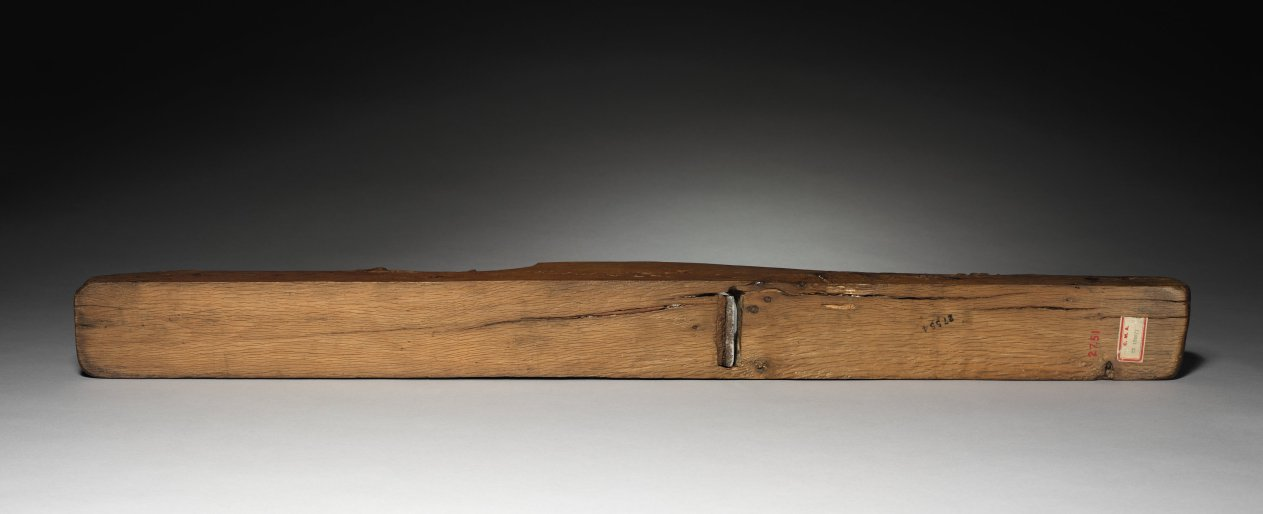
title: Plane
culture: Spain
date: 1600s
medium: oak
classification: Tool